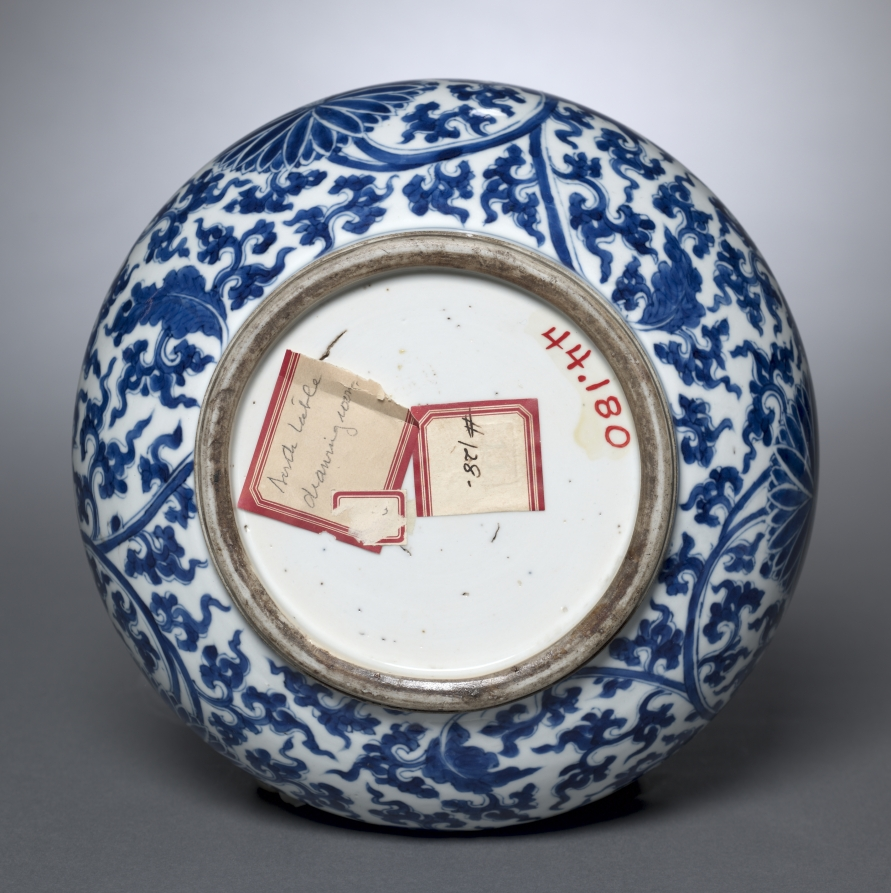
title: Bottle Vase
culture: China, Jiangxi province, Jingdezhen kilns, Qing dynasty (1644-1911), Kangxi reign (1662-1722)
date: 1662–1722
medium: porcelain with underglaze blue decoration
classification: Ceramic